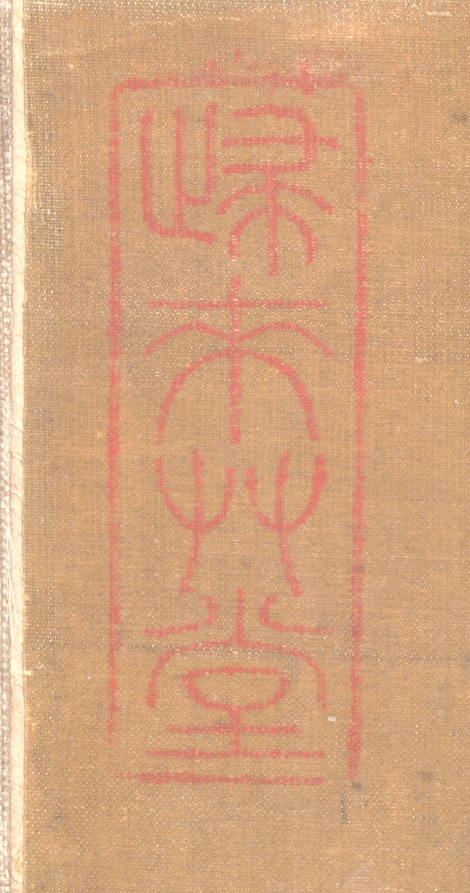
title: Xu Jingyang Moving His Family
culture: China, Ming dynasty (1368–1644)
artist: Cui Zizhong (Chinese, 1574–1644)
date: 1644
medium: Hanging scroll; ink and color on silk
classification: Painting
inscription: Artist's 2 seals: Pei-hai, Cui Zizhong yin.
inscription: 9 additional seals: 2 of Xiang Yuan (18th-19th c.); 1 of Tang Zuomei (late 18th-19th c.); 1 of Zhang Heng 張珩 (1915-1963); 1 of C. C. Wang 王季遷 (1907–2003); 4 unidentified.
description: Xu Jingyang was a dedicated fourth-century Confucian official who allegedly turned into a Daoist immortal. This scroll depicts the legend that when he attained immortality, he took his entire household, including chickens and dogs, to paradise. Cui Zizhong’s painting style intentionally referenced ancient masters. Typical of the pre-Song dynasty landscape tradition, there is the use of blue and green colors and an emphasis on outline rather than texture. While the trembling outlines are reminiscent of earlier painters, the flickering light on rocks and trees is a stylistic feature of Cui’s own time.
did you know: Xu Jingyang, wearing red, is in the upper register of figures, while below his servants transport a rooster, dog, and other supplies.